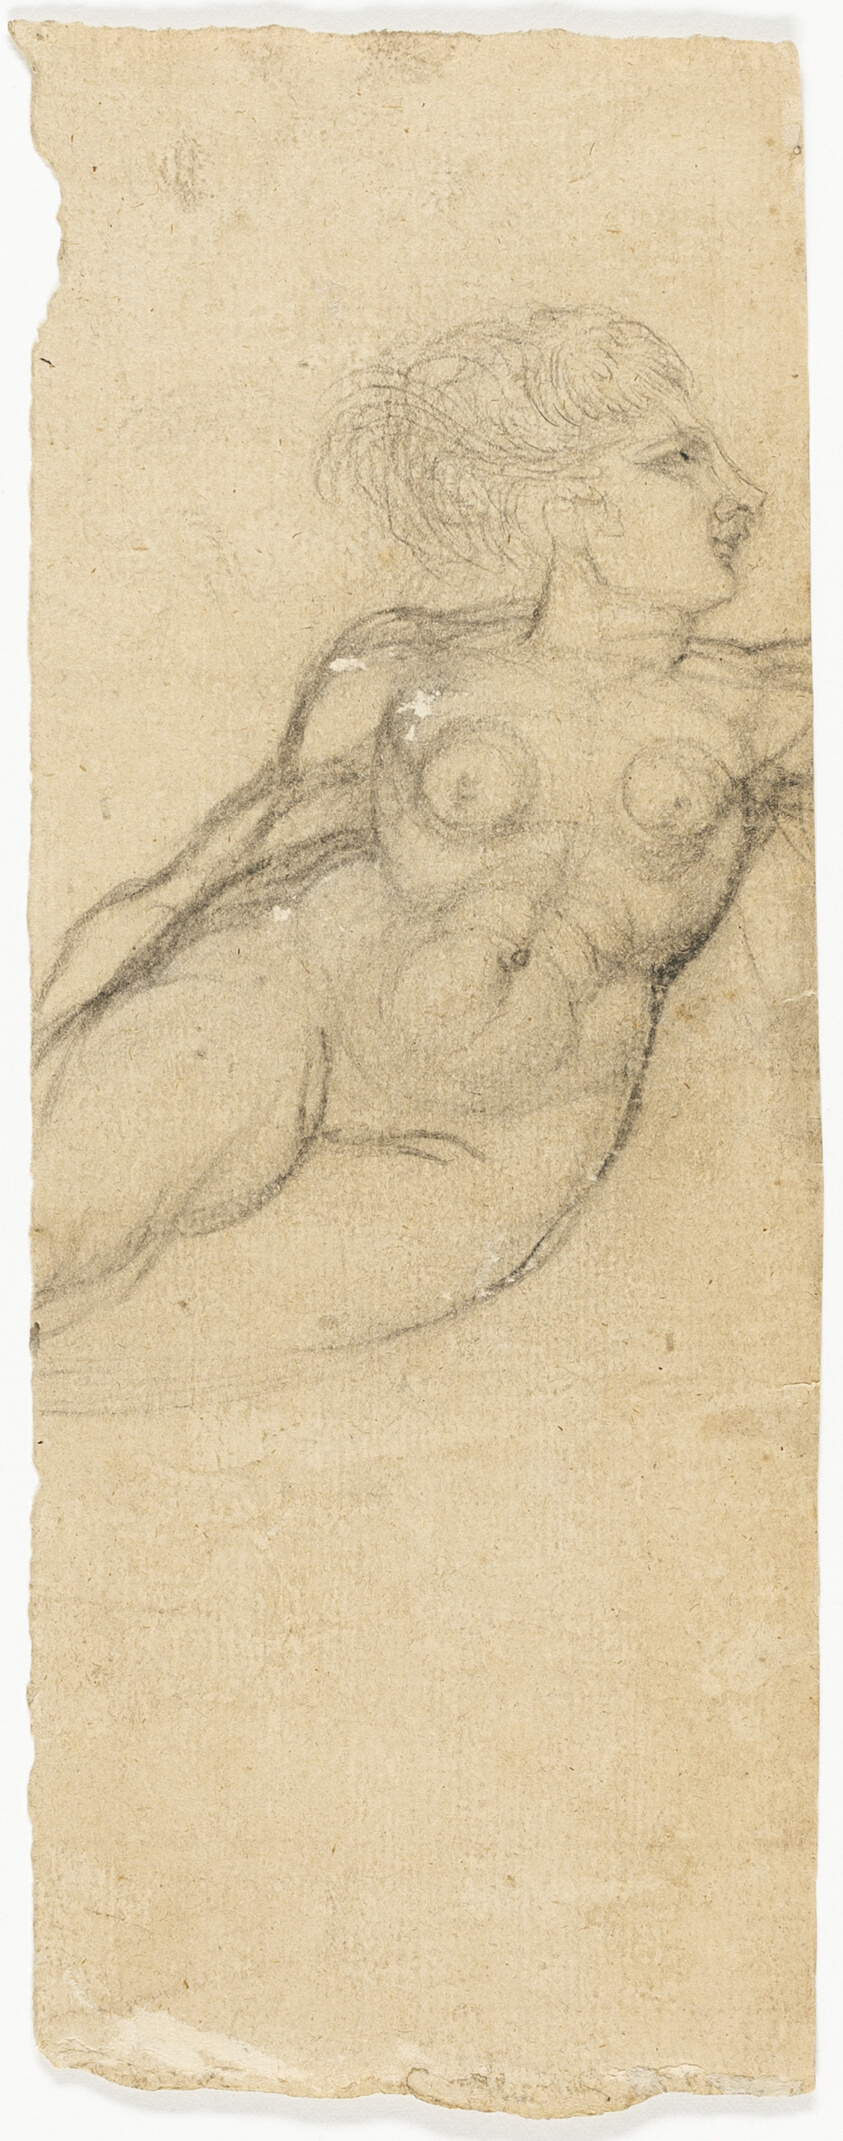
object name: Drawing and Watercolor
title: Studies of Nudes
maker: Attributed to Henry Fuseli; Swiss, active in England, 1741-1825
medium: Black crayon or charcoal, touched with white, on a fragment of tan laid paper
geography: England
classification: crayon; prints and drawing; paper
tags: zigzags